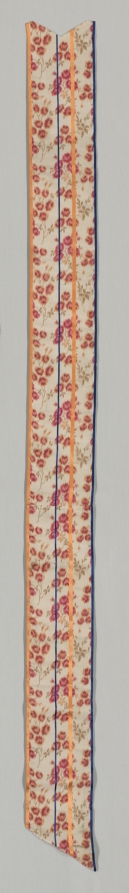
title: Ribbon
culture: France, late 19th century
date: c. 1870s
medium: silk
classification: Textile